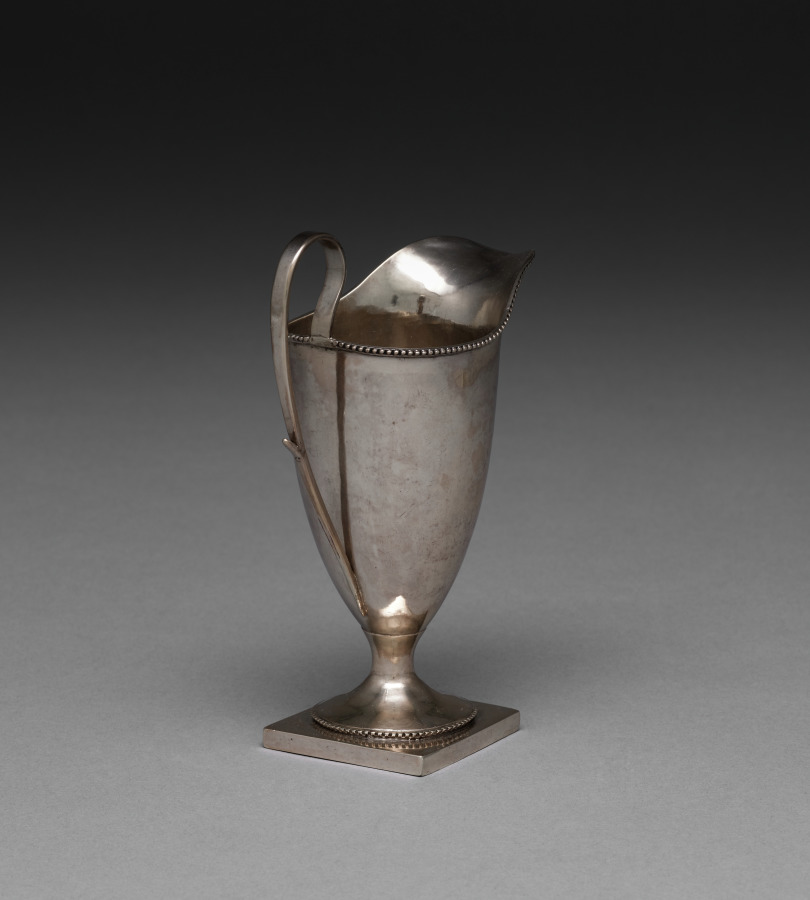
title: Cream Jug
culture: America, Pennsylvania, Philadelphia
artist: attributed to John D. Germon (American)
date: late 1700s–early 1800s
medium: silver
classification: Silver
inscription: engraved in bright-cut script on side of body, to left of handle: DEH.